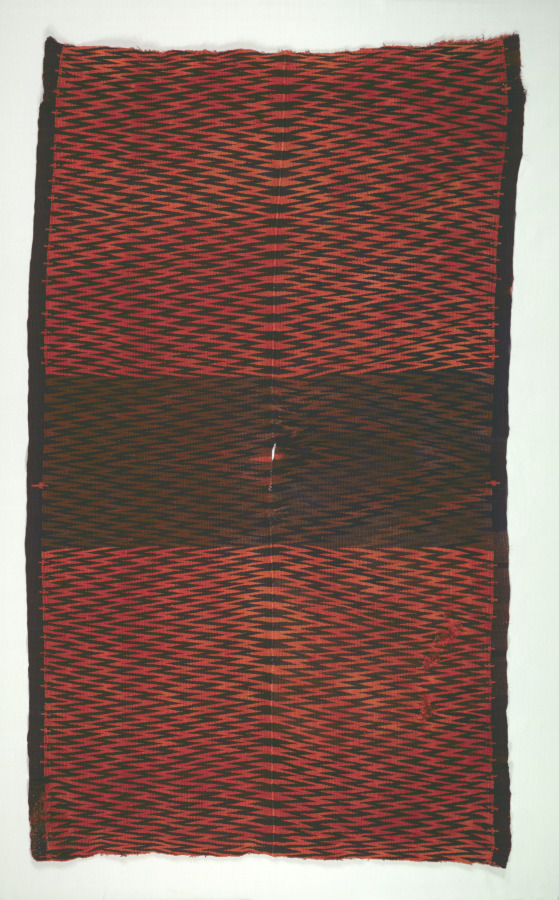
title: Saltillo Style Blanket/ Sarape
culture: America, Native North American, Southwest, Mexico or Rio Grande Hispanic, Post-Contact, Late Classic Period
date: c. 1870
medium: tapestry weave: wool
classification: Textile